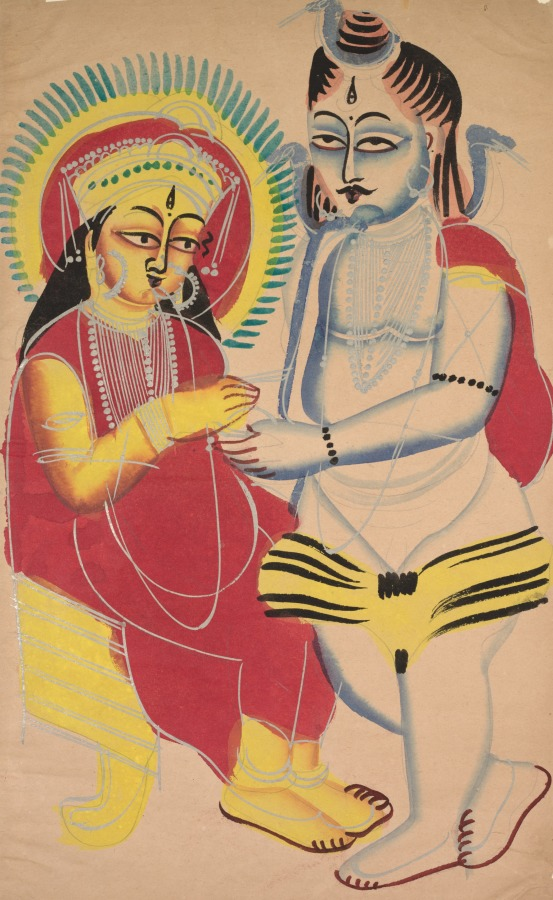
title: Annapurna and Shiva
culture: Eastern India, Bengal, Kolkata, Kalighat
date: c. 1890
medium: Gum tempera, graphite, ink, and tin on paper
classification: Painting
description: Goddess Annapurna (She of Plenteous Food) is depicted being supplicated by Shiva, seen as an ascetic who seeks alms from her. Seated on a throne she places food (possibly rice) in Shiva’s bowl with a spoon held in her right hand. Even Shiva is dependent on her for nourishment and food. A mendicant’s bag is hung on Shiva’s right shoulder.